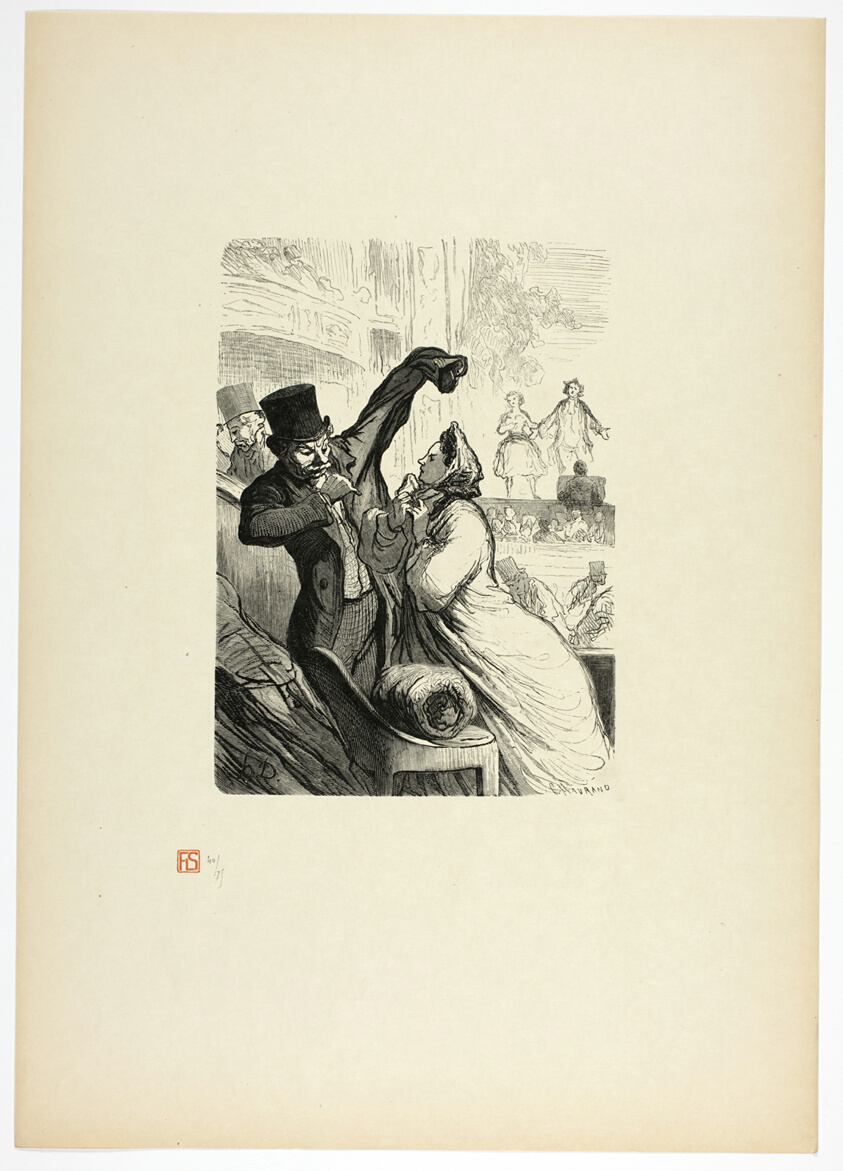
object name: Print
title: Le couplet final, from Tirage Unique de Trente-Six Bois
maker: Charles Maurand (French, 1824-1904); after Honoré Victorin Daumier (French, 1808-1879); printed by François Louis Schmied (Swiss, 1873-1941); published by Jules Meynial (French, 20th century)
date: 1862, printed 1920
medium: Wood engraving on cream Japanese paper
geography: France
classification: wood engraving; print; prints and drawing